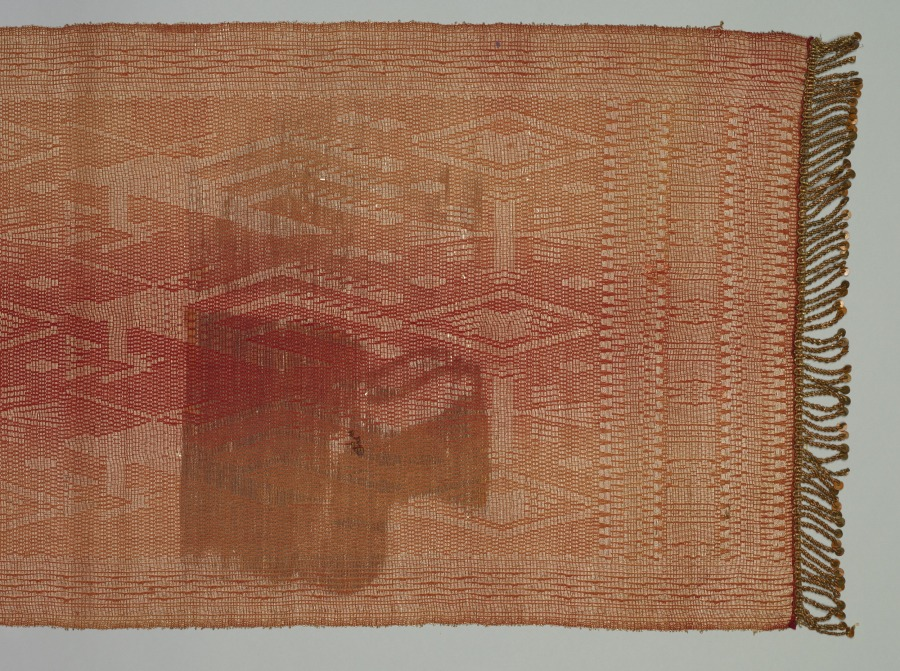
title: Brocade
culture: Indonesia, Sumatra, Minangkabau, late 19th century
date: late 1800s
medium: brocade; silk and metal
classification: Textile